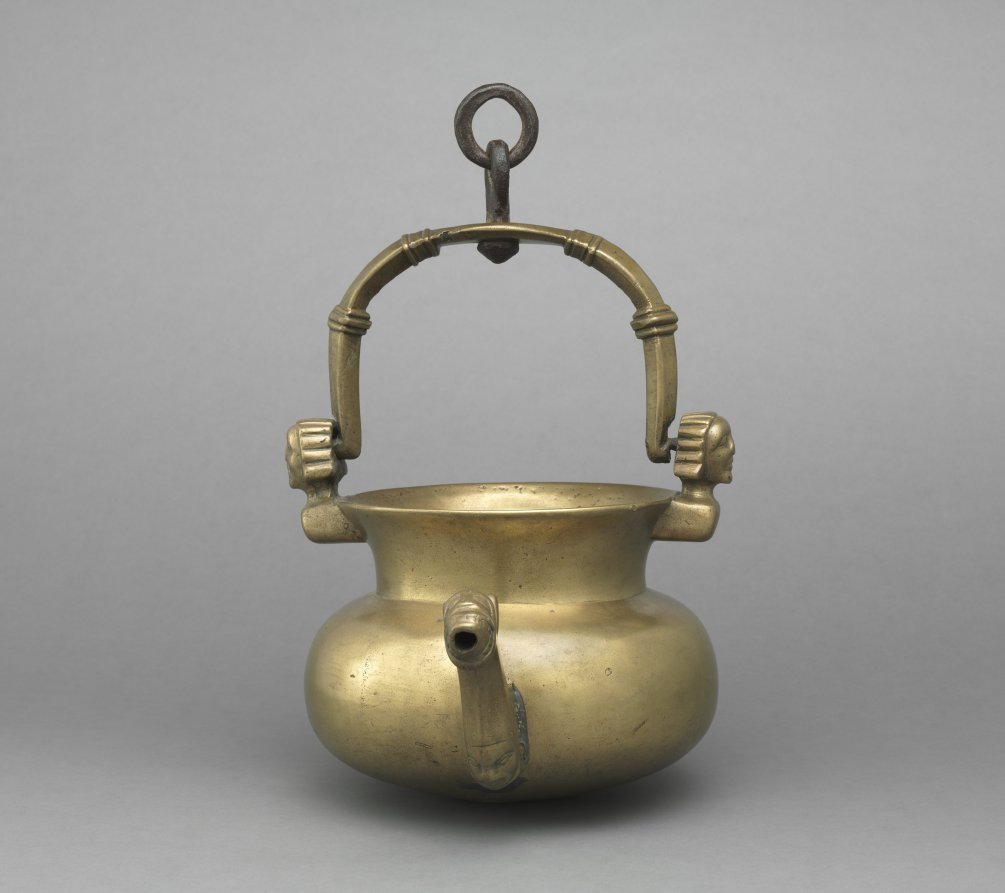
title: Lavabo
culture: South Netherlands, Valley of the Meuse, 15th century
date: 1400s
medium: brass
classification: Metalwork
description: In the Middle Ages a variety of vessels were used for hand washing. This brass container, called a lavabo, was designed to hold a large quantity of water and may have functioned in either a domestic or a liturgical setting. Its large capacity and relatively simple decoration suggests it served a communal function, either in a private home or perhaps in a monastery where it would have served as a hand-washing station near the refectory. In private homes, lavabos of similar design were usually hung from a chain or a trammel hook over or near the fire in the kitchen. The ring inserted at the top of the handle would have allowed for the rotation of the vessel while it was suspended, facilitating access to the spouts for water. Seen in conjunction with other vessels displayed nearby, this object illustrates the variety of hand-washing vessels used by medieval men and women.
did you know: On either side of the handle appear two human faces while the spouts themselves are animals, perhaps lions or dogs.